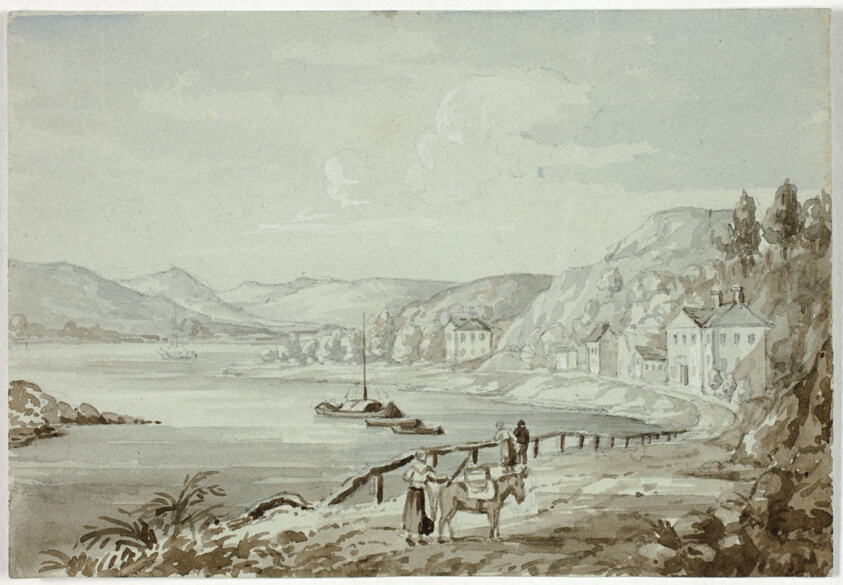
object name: Drawing and Watercolor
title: On the Rhine (recto), and Mother and Child (verso)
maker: Elizabeth Murray (English, c. 1815-1882)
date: 1841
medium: Brush and brown and gray wash, heightened with white gouache, over graphite (recto), and graphite (verso), on blue wove paper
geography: England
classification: ink or chalk wash; drawings (visual works); prints and drawing